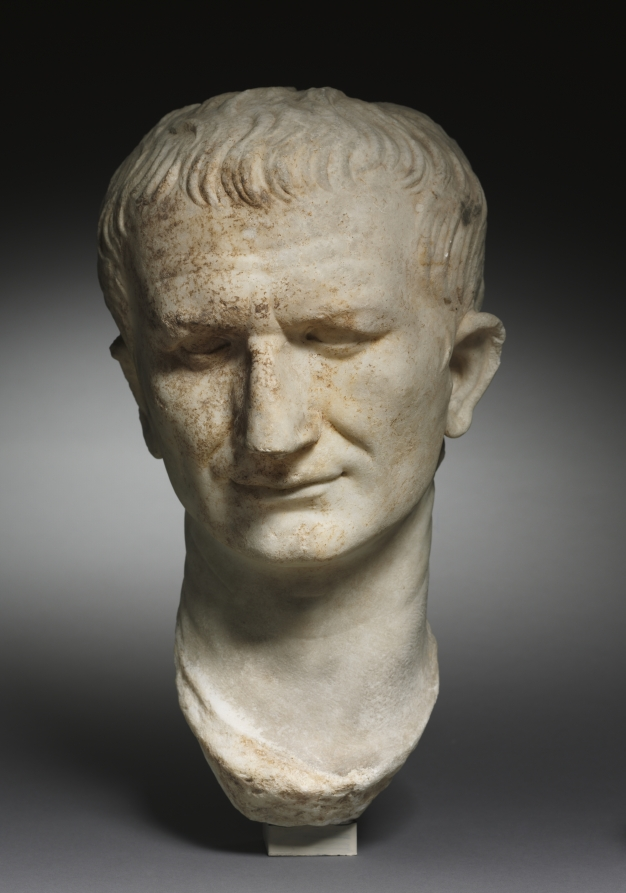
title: Portrait Head of Emperor Vespasian, Recut from Head of Nero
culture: Italy, Roman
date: 64–79 CE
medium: marble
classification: Sculpture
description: Although this portrait head was designed to fit into a statue of a body, it did not originally belong with the togate body that held it when purchased by the museum in 1929. In 1973, the two were separated, and the body is now in storage. The head itself was recarved in antiquity, from a likeness of Nero to one of Vespasian, following the damnatio memoriae (condemnation of memory) of the former. A line at the back of head shows clearly where the long hair of Nero has been shortened, while other Neronian features, such as a receding lower lip, remain.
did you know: Originally a portrait of Emperor Nero, this head was recarved after his damnatio memoriae (condemnation of memory).